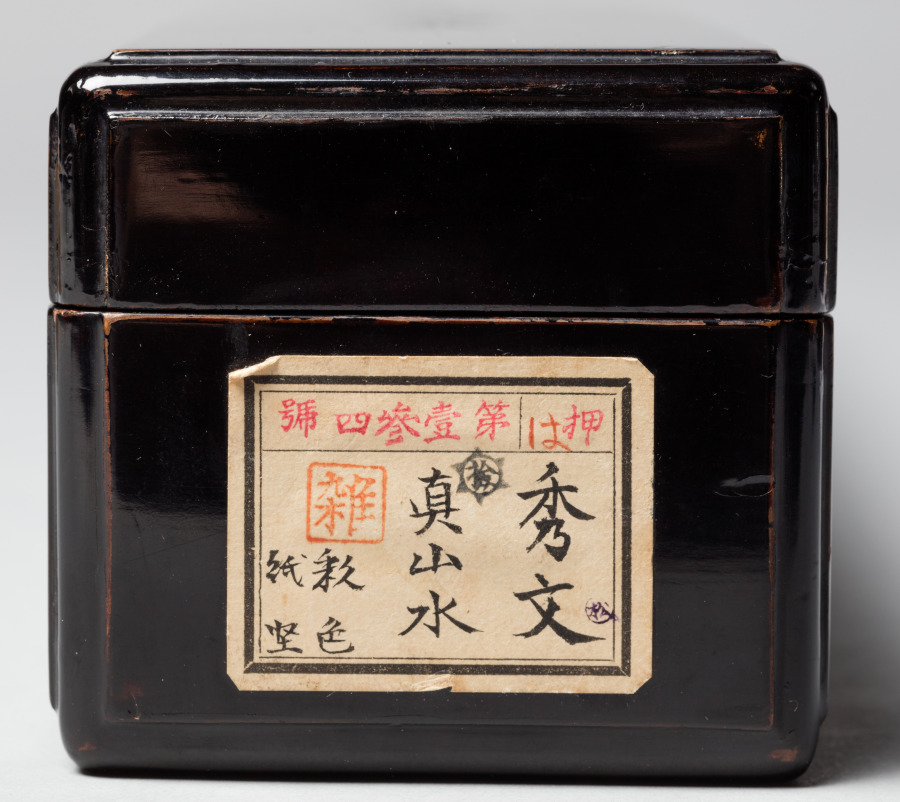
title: Landscape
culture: Japan, Muromachi period (1392–1573)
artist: Judō (Japanese, active 16th century)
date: 1500s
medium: hanging scroll, ink and light color on paper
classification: Painting